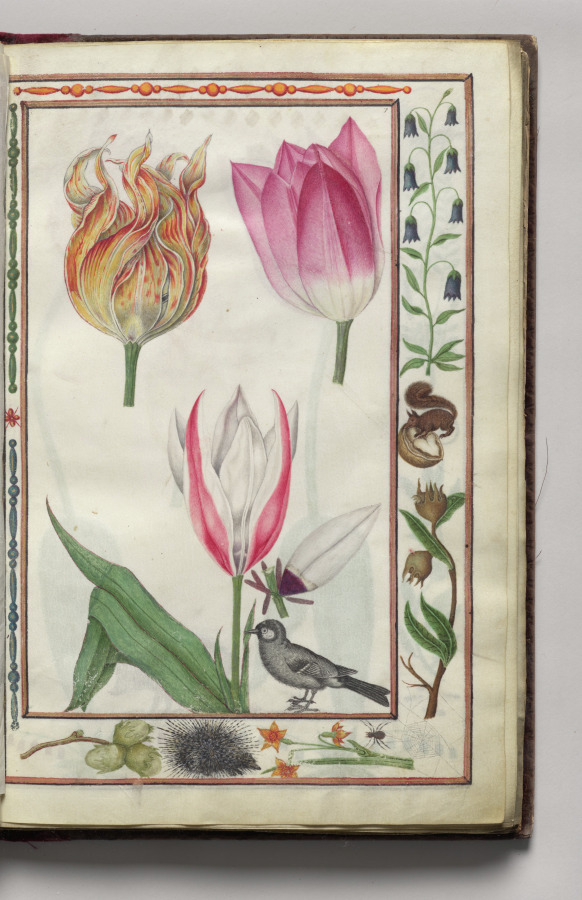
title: Tulipa Clusiana with Campanula, Porcupine, Spider, and Squirrel Border, folio 4 (recto), from Florilegium (A Book of Flower Studies)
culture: France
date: 1608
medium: watercolor, ink, silver, and gold over occasional traces of pencil, on vellum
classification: Bound Volume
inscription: Dated: Poitiers 1608 (on frontispiece) Signed: On frontispiece in black ink, lower right: Van Kuyk Notation on drawing: Frontispiece: in pencil, lower margin: * élève de Van Kessel, peintre flammand (* in pencil also appears in front of Van Kuyk's name).